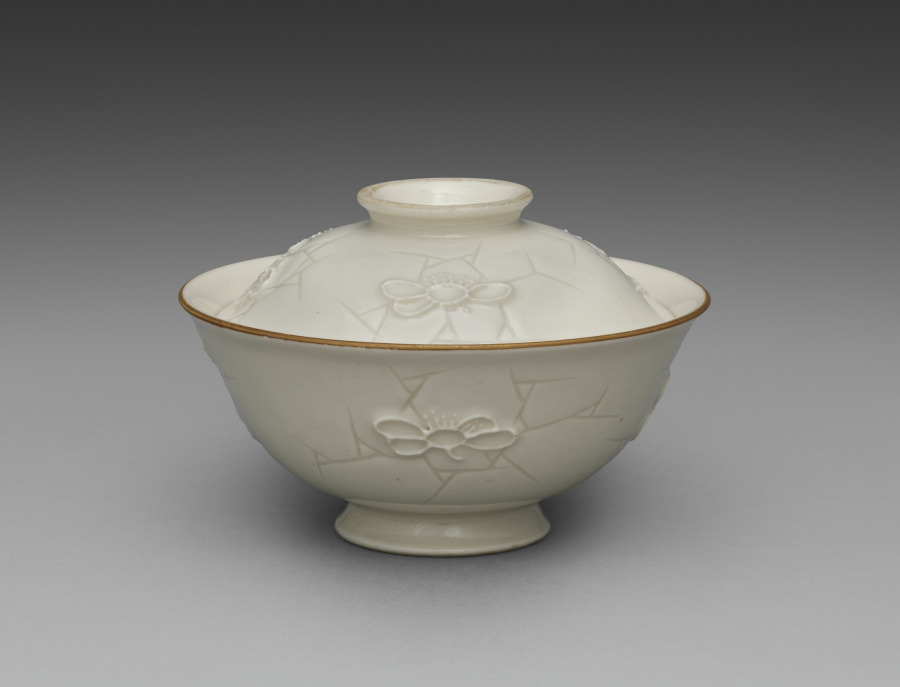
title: Covered Bowl from Dining Set with Plum Blossoms and Cracked-Ice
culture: Japan, Meiji period (1868–1912)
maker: Seifū Yohei II (Japanese, 1844–1878)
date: c. 1875–78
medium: Porcelain with molded designs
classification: Ceramic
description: Each item in this set has a delicate low-relief design of flowering plum branches over scattered, intersecting lines meant to resemble the cracked-ice surface of a frozen body of water and is signed on the base in gold pigment. While Yohei II produced many fine works in underglaze blue, like those produced by Kiyomizu Shichibei, he also made works in quite different styles later in his career, from the early 1870 s. In 1873, he was appointed purveyor to the Industrial Center of Kyoto Prefecture, a designation associated with Kyoto’s efforts to reach an international market through the port of Kobe; and from 1875 until his death, he was involved in national-level projects to present Japanese ceramics across the world. It was during this period that Yohei III was apprenticed to Yohei II, and it has been suggested that this set may in fact be an early example of Yohei III’s work, which he signed with his teacher’s name. Decorated with flowers resembling Japanese textile motifs, the set calls to mind the design of Yohei II’s pair of vases with plum blossoms in the Victoria and Albert Museum. Here, the elaborate trees created for a formal public exhibition setting have been translated into the approachable blossoms of the genteel domestic environment. While the designs are consistent across the pieces, each raised flower petal and pistil and each incised line in the ice was done by hand, so the cups, bowls, and dishes are similar yet unique. The bottoms of two boxes once identified the set’s owner, but the information has been deliberately obscured with black ink. However, inscriptions still visible appear to indicate two occasions, once at the end of July 1886 , and once again in June 1916 , when parts of the set were requested from Hokura in Niigata Prefecture. The location corresponds to a neighborhood in the present-day city of Jōetsu. The surname Tsuji 辻 also appears on a paper tag affixed to one of the box cloths. Future research may possibly reveal more about their provenance. A vase by Yohei III in a private collection combines the formal grandeur of the Yohei II vases in the Victoria and Albert Museum with the gentler design of this dining set, placing flowering plum trees against soft, scalloped-edge clouds resembling those in golden screens.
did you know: The dining wares have a creamy white coloration that the four boxes containing them identify as Korean in style.